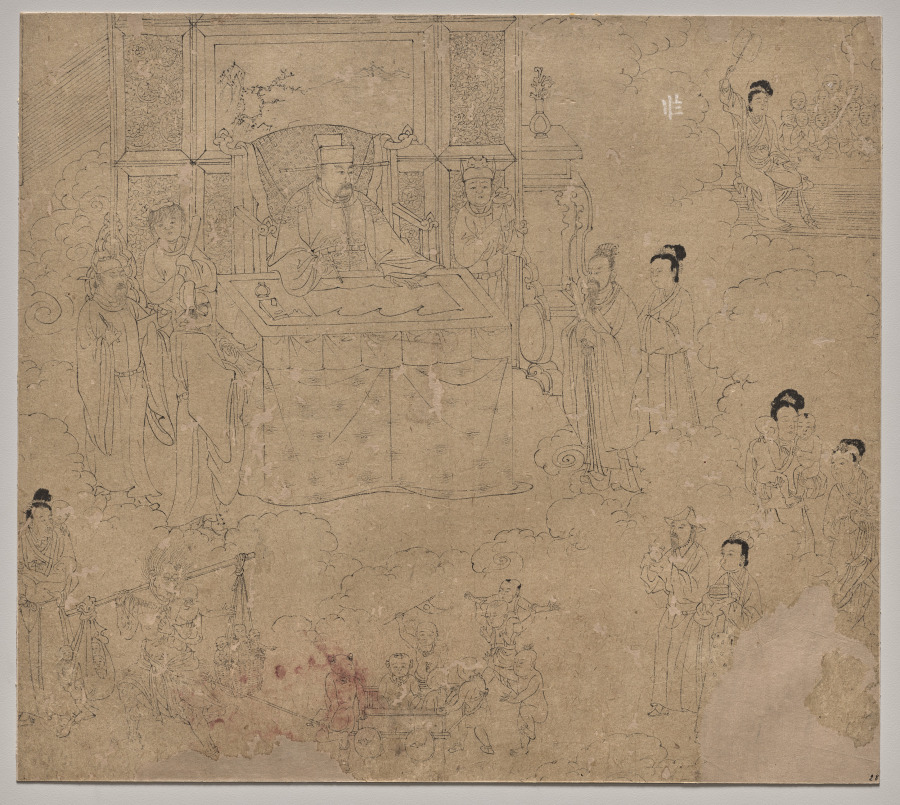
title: Album of Daoist and Buddhist Themes: Kings of Hells: Leaf 28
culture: China, Southern Song dynasty (1127-1279)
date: 1200s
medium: Album, ink on paper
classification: Painting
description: This extraordinary album has 50 paintings on a variety of religious subjects. They were likely created by several master craftsmen to share with studio apprentices as models for fulfilling commissions. The Jade Emperor and the Daoist pantheon make up the first 26 leaves. The next 14 leaves portray the Buddhist Ten Kings of Hell administering punishments to the dead. The third section, called “Clearing the Mountains,” features divine soldiers, led presumably by the deity Erlang Shen 二郎神, fighting undesirable creatures.